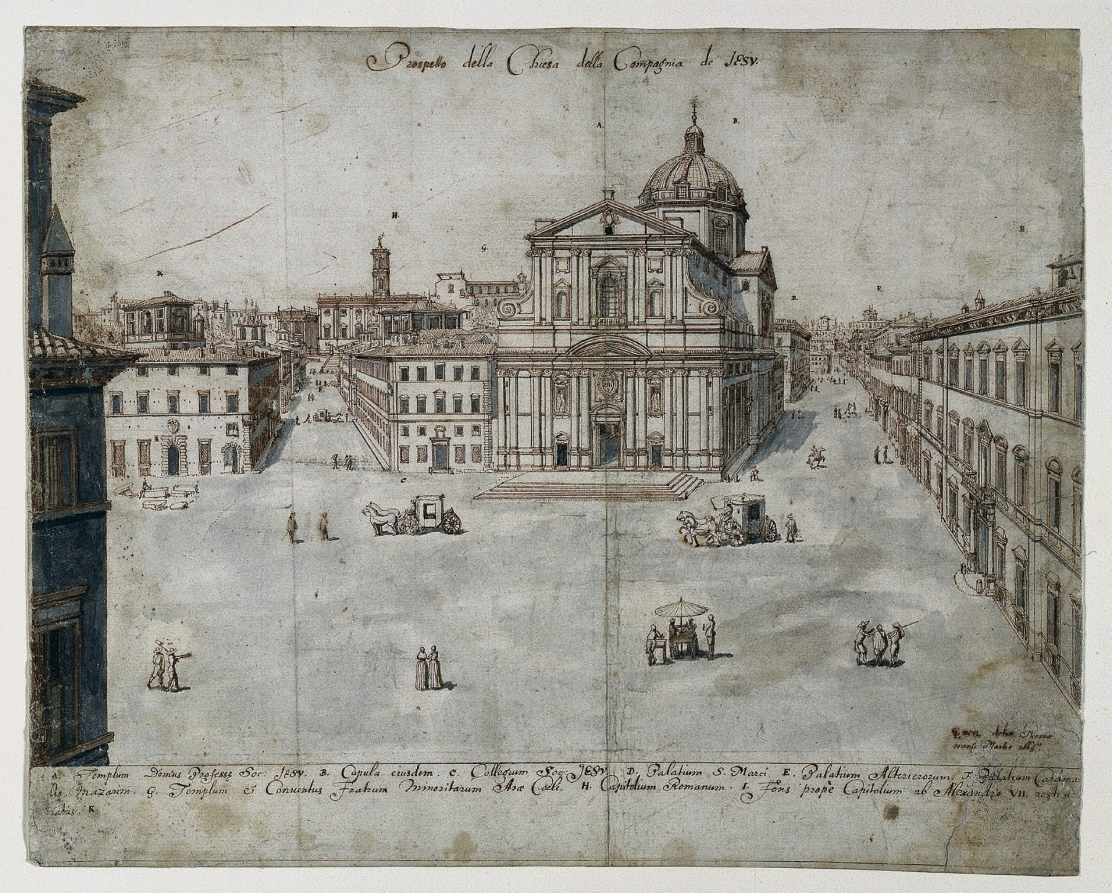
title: Eighteen Views of Rome: The Church of the Gesù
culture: Flanders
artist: Lievin Cruyl (Flemish, c. 1640-c. 1720)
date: 1665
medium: pen and brown ink and brush and gray wash over graphite; framing lines in brown ink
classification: Drawing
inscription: signed, lower right, in brown ink: [artist's monogram: LC] RVYL delin. Romæ / mense Martio 1665. ; by artist, upper center, in brown ink: Prospetto della Chiesa della Compagnia di JESU. ; by artist, throughout composition, in brown ink: [the letters A-H] ; by artist, across bottom, in brown ink: A. Templum Domus Professæ Soc: JESU. B. Cupula eiusdem. C. Collegium Soc: JESU. D. Palatium S. Marci. E. Palatium Alterierorum. F. Palatium Cardina= / lis Mazarini. G. Templum et Conventus Fratrum Minoritarum Aræ Coeli. H. Capitolium Romanum. I. Fons propè Capitolium ab Alexandro VII. restau= / ratus. K. ; ON STRIPS OF PAPER MOUNTED TO VERSO, lower center, in graphite: A20981 ; lower right, in graphite: E. 18